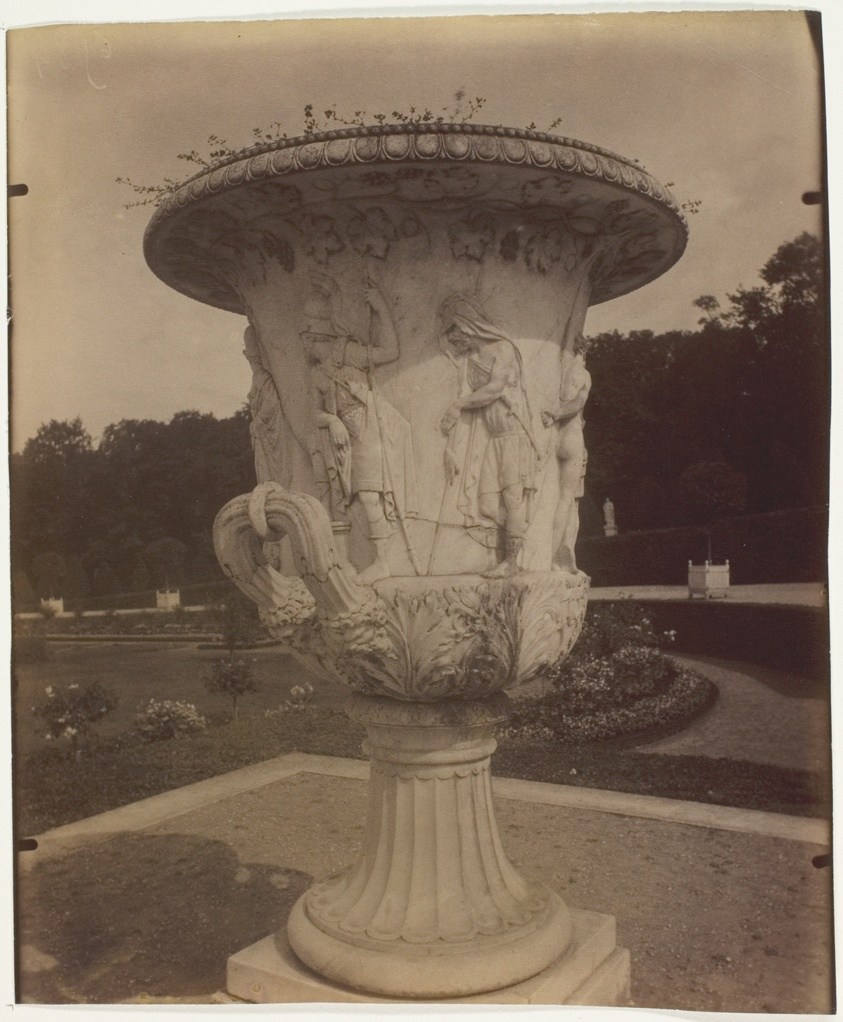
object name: Photograph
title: Versailles, (Vase)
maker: Jean-Eugène-Auguste Atget (French, 1857–1927)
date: 1905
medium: Albumen print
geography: France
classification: albumen silver print; photographic process; photography; photograph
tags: Collected by Hugh Edwards